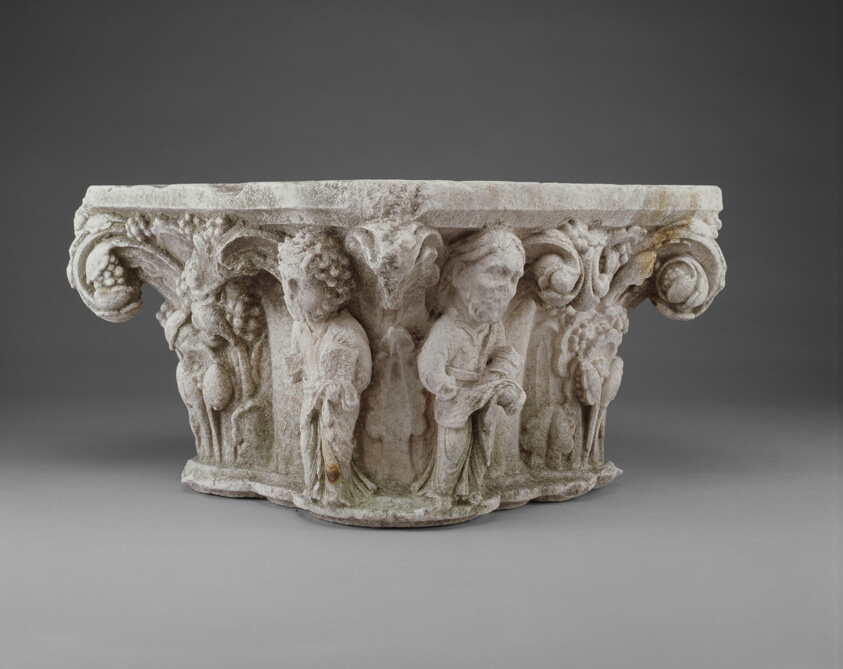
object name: Sculpture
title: Capital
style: medieval, 13th century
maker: French; Champagne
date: 1170/1200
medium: Limestone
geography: France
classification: architectural sculpture; sculpture; french; stone; limestone; sculpture/stone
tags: architectural fragment, architechture, architectural, architectural detail, figures, foliage, food, fruit, grapes